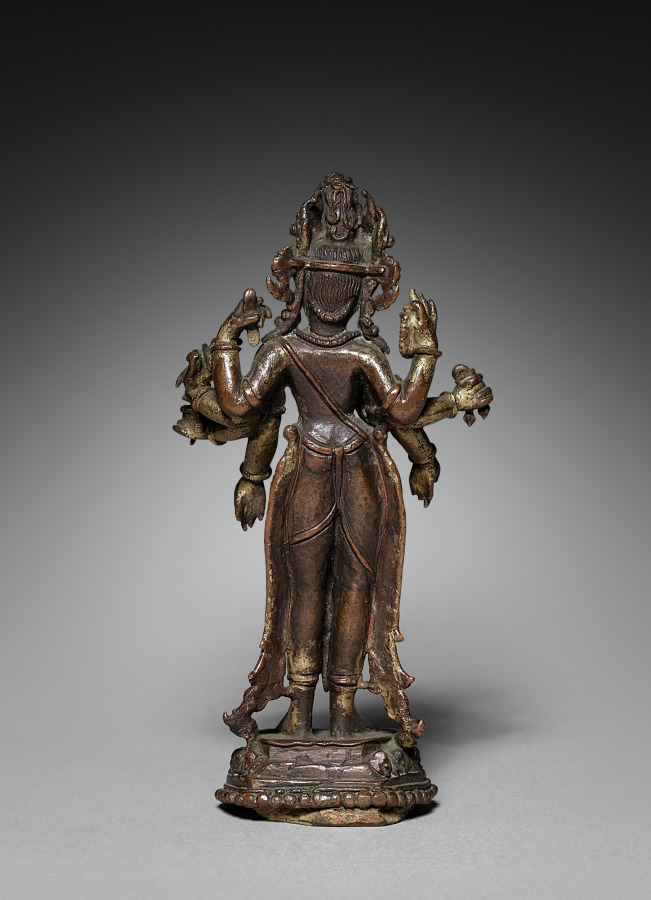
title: Lokesvara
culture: Nepal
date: 1600s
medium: gilded copper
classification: Sculpture